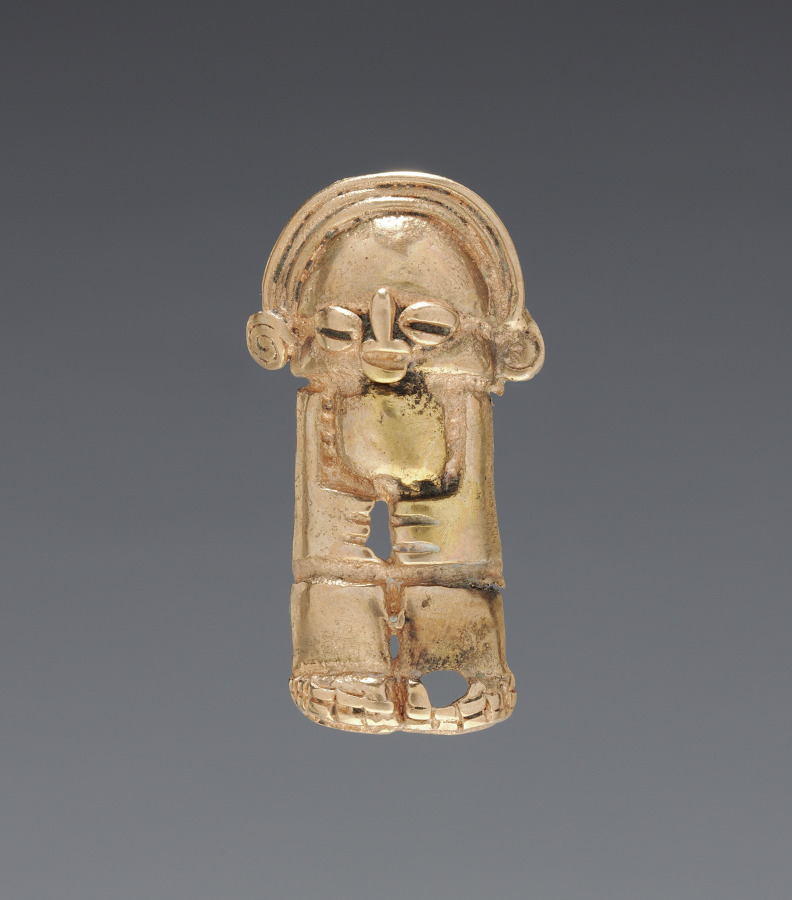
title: Necklace Figurine Bead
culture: Colombia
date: 1–700 CE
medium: cast gold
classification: Jewelry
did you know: Working with gold dates back to at least 500 BC in Ecuador and Colombia.